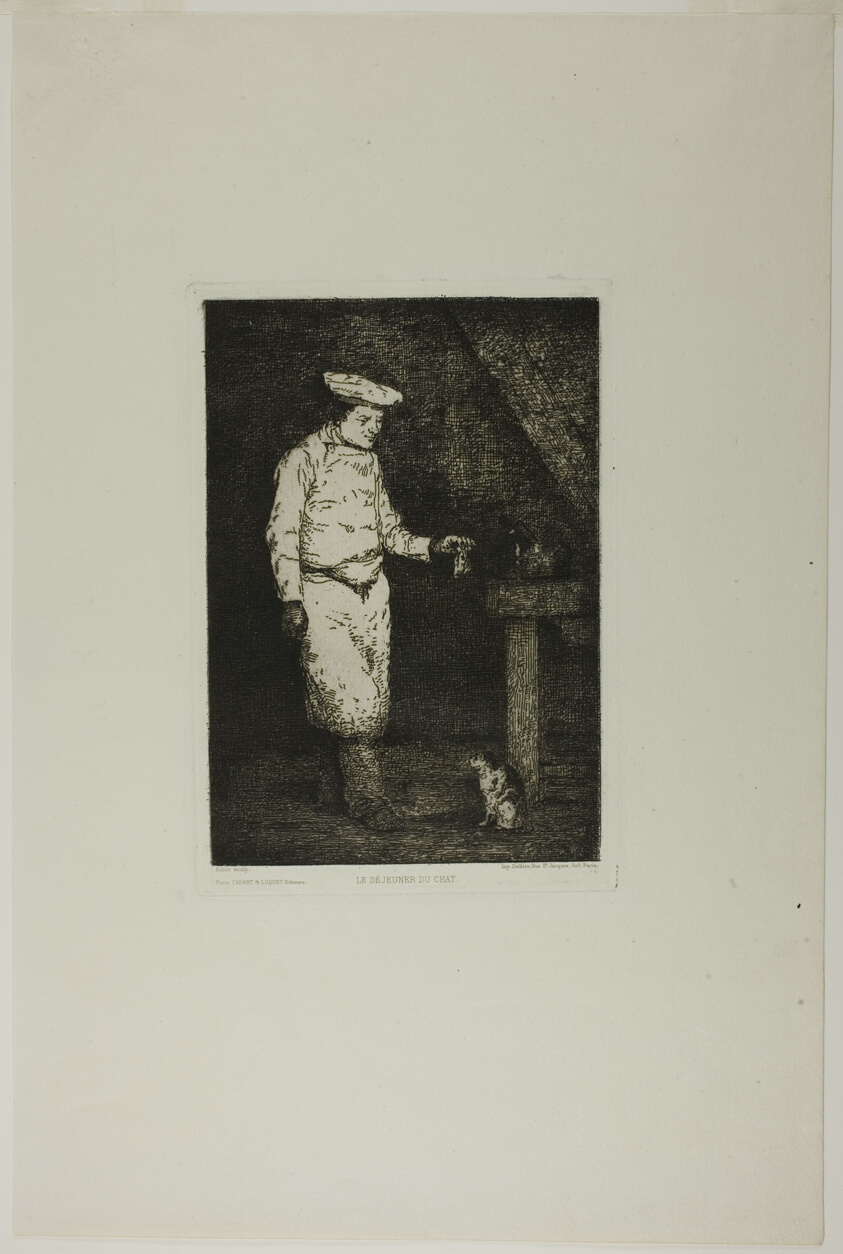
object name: Print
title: The Cat's Lunch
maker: Théodule Augustin Ribot (French, 1823-1891); printed by Auguste Delâtre (French, 1822-1907); published by Cadart & Luquet, Editeurs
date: c. 1863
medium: Etching on ivory laid paper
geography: France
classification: etching; print; prints and drawing